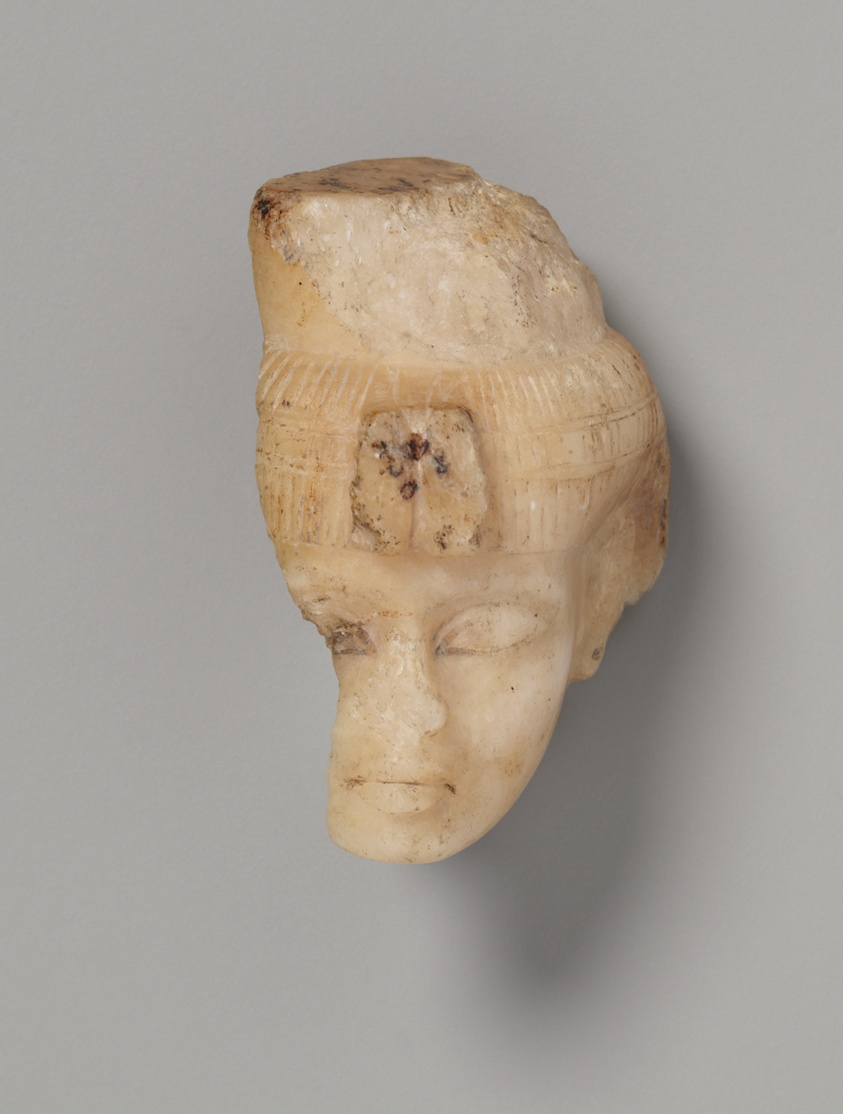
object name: Sculpture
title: Head From a Shabti (Funerary Figurine) of Queen Tiye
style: new kingdom, amarna period, ancient, egyptian, eighteenth dynasty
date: New Kingdom, Dynasty 18, Reign of Akhenaten (about 1352–1336 BCE)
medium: Travertine (Egyptian alabaster) with traces of pigment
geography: Egypt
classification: ushabti; fragment; figurine; stone; sculpture; ancient art; funerary; mummy goods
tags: portraits, queens